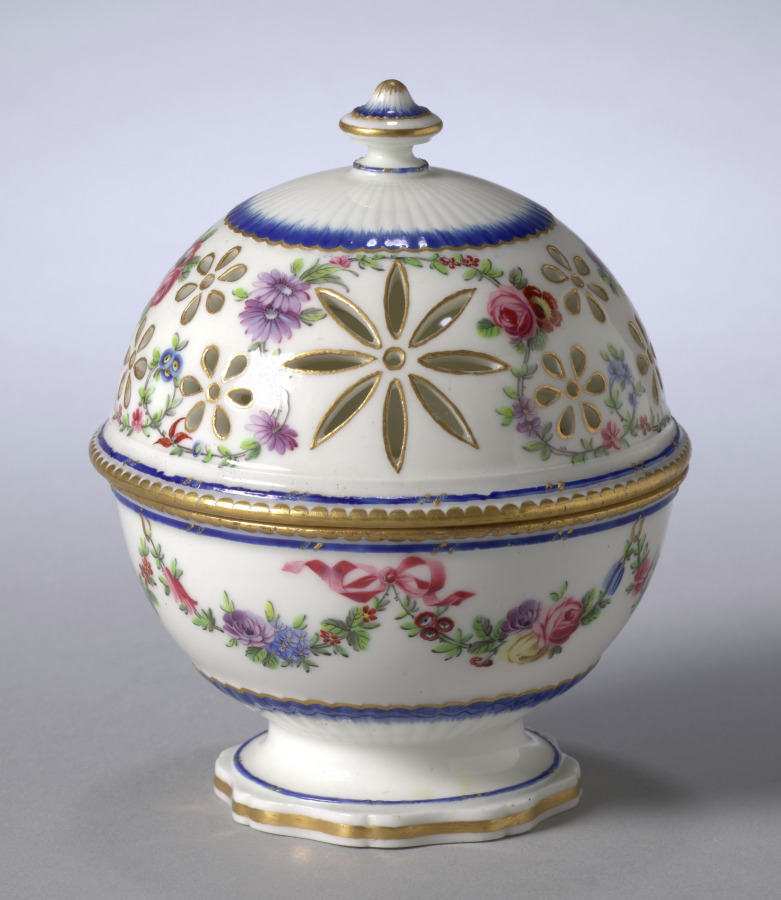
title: Sponge Box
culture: France, Sèvres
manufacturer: Sèvres Porcelain Factory (French, est. 1756)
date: c. 1769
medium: soft-paste porcelain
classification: Ceramic